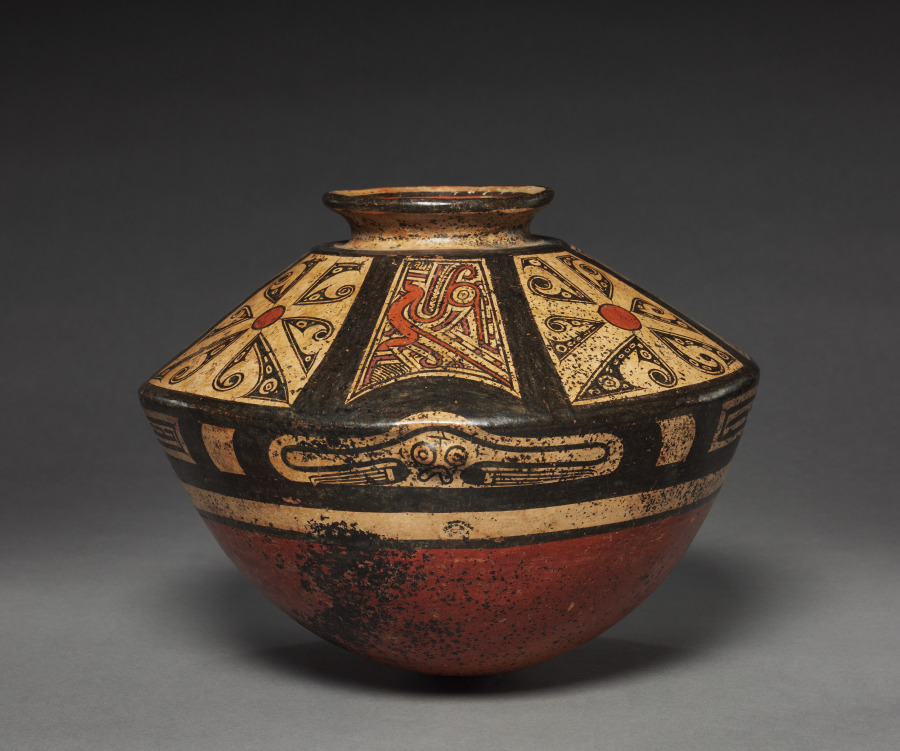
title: Vessel: Turtle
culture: Panama, Parita style, 11th-14th century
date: 1000–1300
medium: ceramic, slip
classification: Ceramic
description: Many Panamanian ceramics are among the most handsome and deftly designed in the Americas. Note how cleverly the artist used the vessel shape to imitate a turtle's carapace, its head peering out from its shell, its feet painted on the back (no. 10). And the stingray floats atop its pedestal, as though gliding through water (no. 9). Lamentably, little is known about the meaning of these witty ceramics.